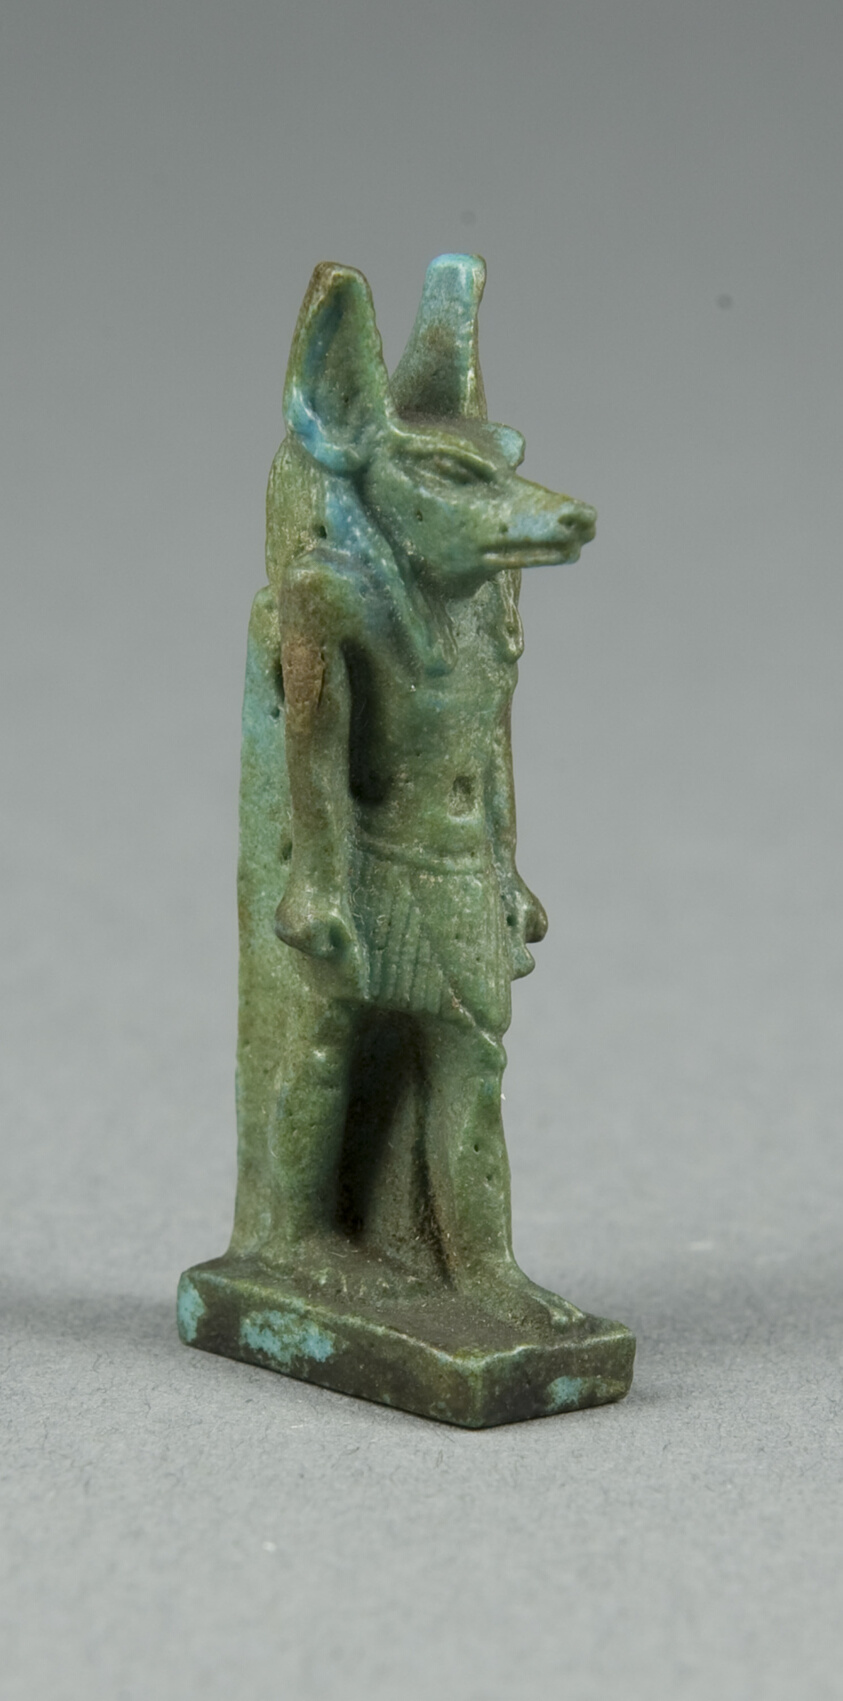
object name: Costume and Accessories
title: Amulet of the God Anubis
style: third intermediate period, egyptian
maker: Egyptian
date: Third Intermediate Period, Dynasty 21–25 (1070–656 BCE)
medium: Faience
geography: Egypt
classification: amulet; jewelry; ceramics; ancient art; costume; faïence (composite material)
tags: gods (deities)